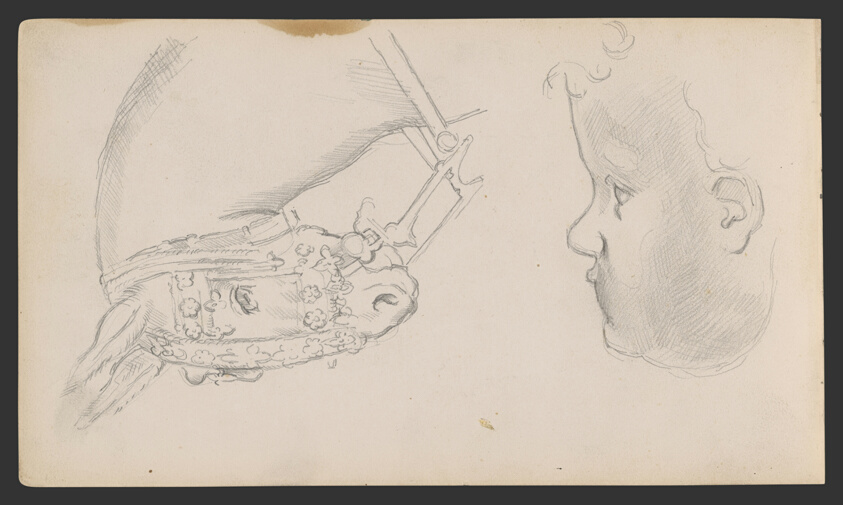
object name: Drawing and Watercolor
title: Sketchbook No. 2 (L'Estaque)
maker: Paul Cézanne; French, 1839-1906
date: 1875–86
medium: Graphite and pen and ink drawings on paper, bound into a book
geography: France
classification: sketchbook; graphite; prints and drawing; paper